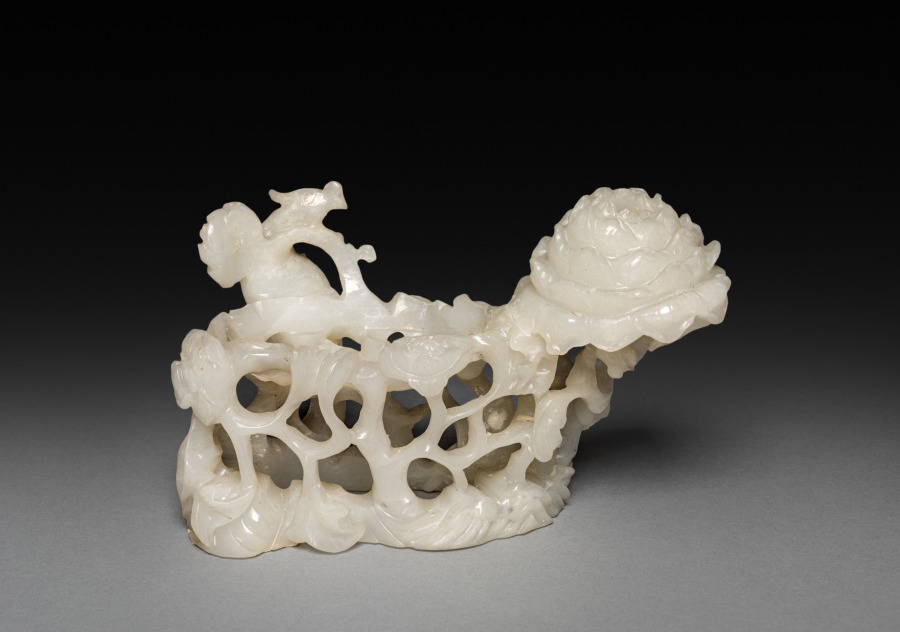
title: Three-Sectional Altar Group: Cylindrical Carving with Phoenix (base)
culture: China, Qing dynasty (1644-1911)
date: 1644–1911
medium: jade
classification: Jade